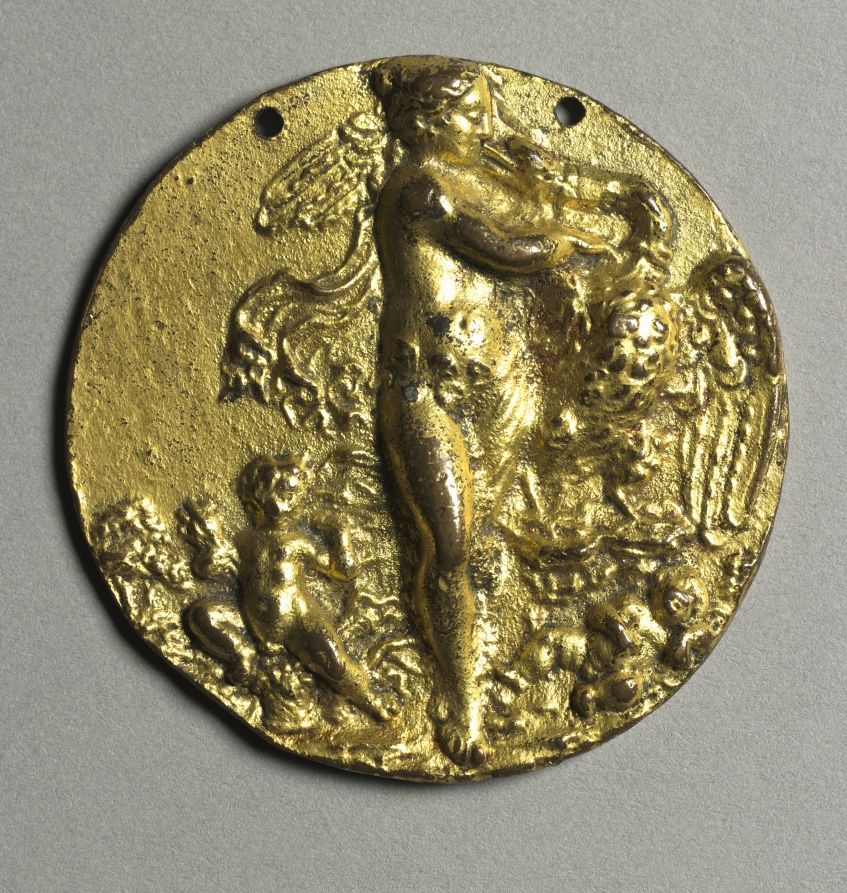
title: Leda and the Swan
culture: Italy, 16th century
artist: Master of the Birth of Venus (German)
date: c. 1520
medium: gilt bronze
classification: Sculpture